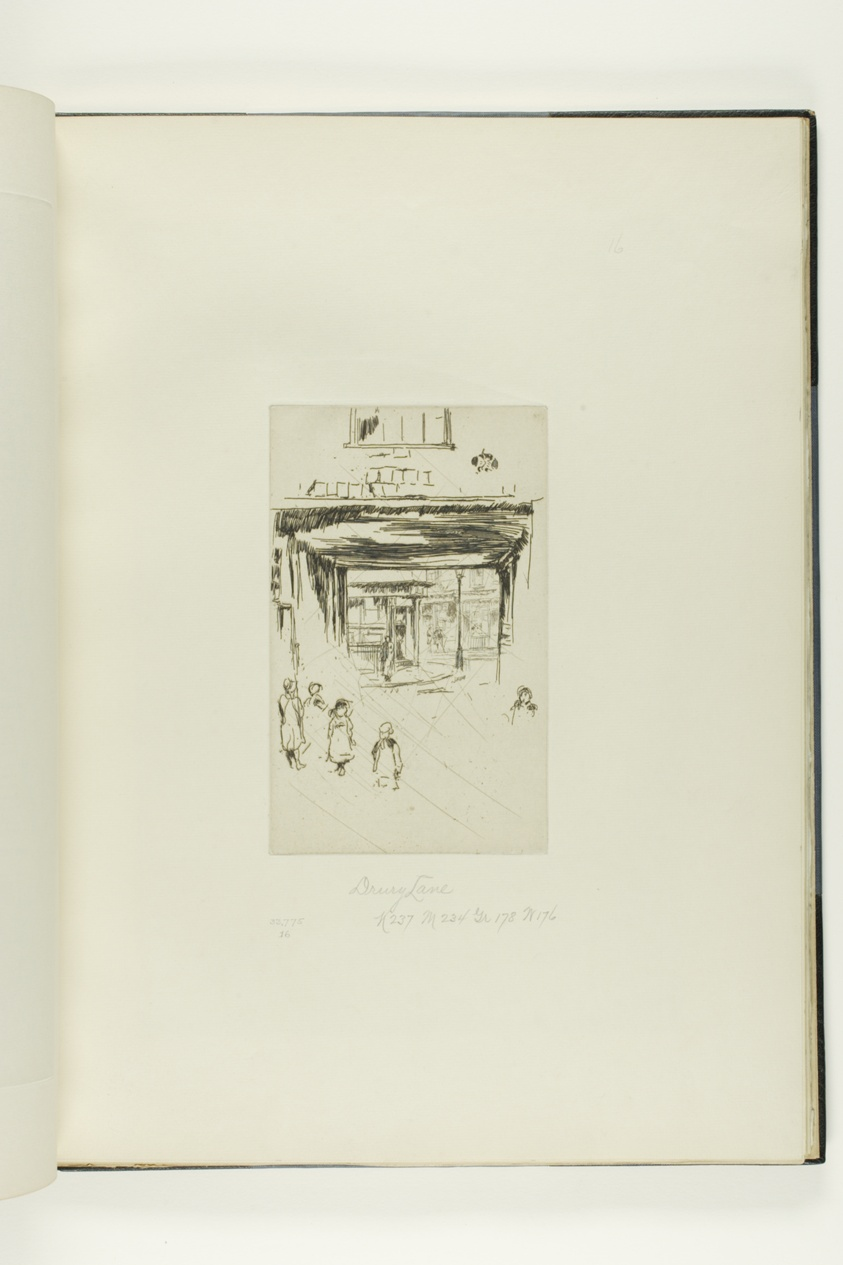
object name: Print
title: Drury Lane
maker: James McNeill Whistler (American, 1834-1903)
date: 1880/81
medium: Etching with foul biting, with drypoint cancellation, in dark brown ink on ivory wove paper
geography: United States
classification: etching; prints and drawing; print; drypoint; foul biting; book; paper